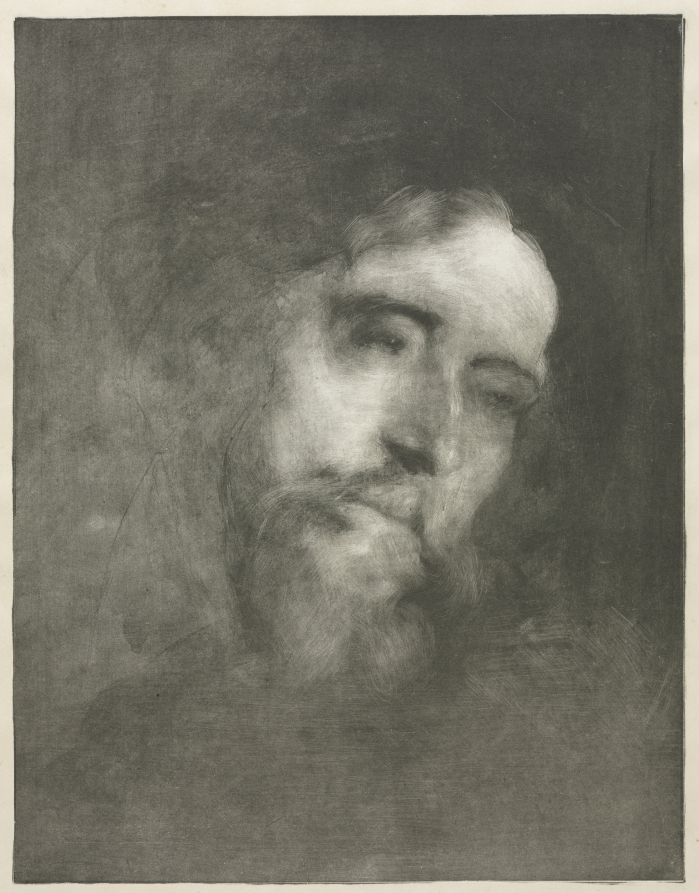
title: Alphonse Daudet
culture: France, 19th century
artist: Eugène Carrière (French, 1849–1906)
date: 1893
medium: lithograph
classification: Print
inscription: inscribed and signed, lower right, in graphite: Jean Dolent [?] mon ami Eugène Carrière